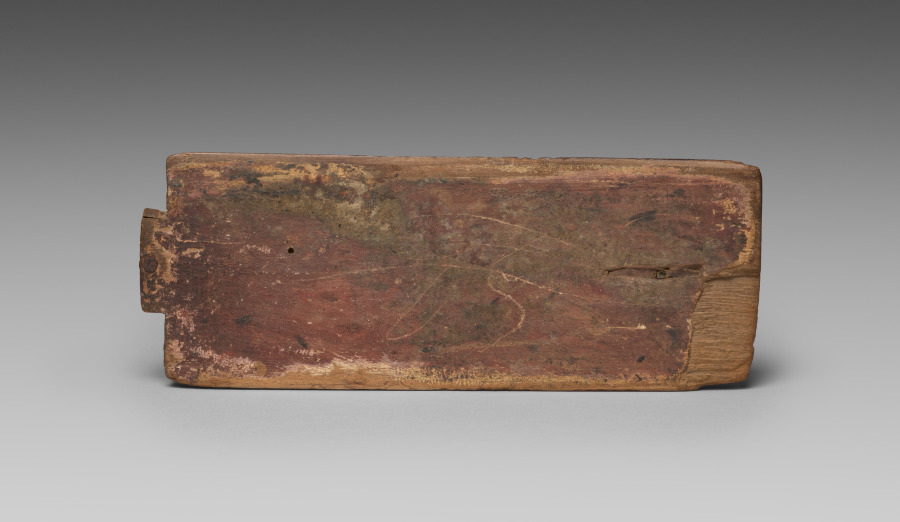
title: Reliquary Box with Scenes from the Life of John the Baptist (lid)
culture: Byzantium, Constantinople, late Byzantine period, 14th century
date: 1300s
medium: tempera, gold, wood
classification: Wood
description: John the Baptist--the first person to recognize Christ as the promised savior and the one who baptized him in the Jordan River--was one of the Byzantine Empire’s most revered saints. This box shows four scenes from the saint’s life: John’s martyrdom, Christ’s baptism, John’s birth, and the announcement of his birth to his parents. It probably once housed one of the saint’s relics; several were kept in churches and monasteries in Constantinople, including fragments of his skull and right arm and locks of his blood-clotted hair.